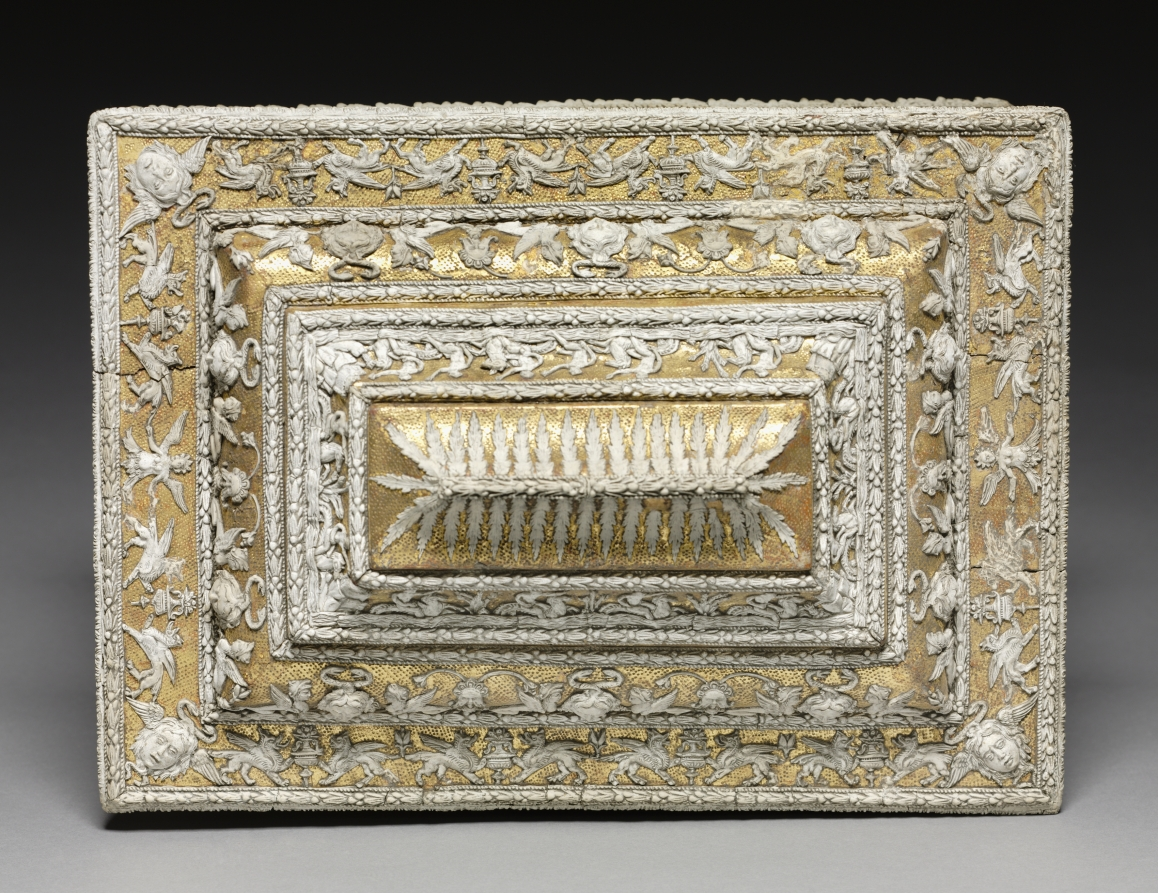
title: Box with Military Scenes from Antiquity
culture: Workshop of the Cleveland Casket (Italy), 16th century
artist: Workshop of the Cleveland Casket (Italian)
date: c. 1520–1530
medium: pastiglia on gilded wood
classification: Furniture and woodwork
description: This box features four military scenes from antiquity: an allegiance, a triumph, a battle, and an execution.